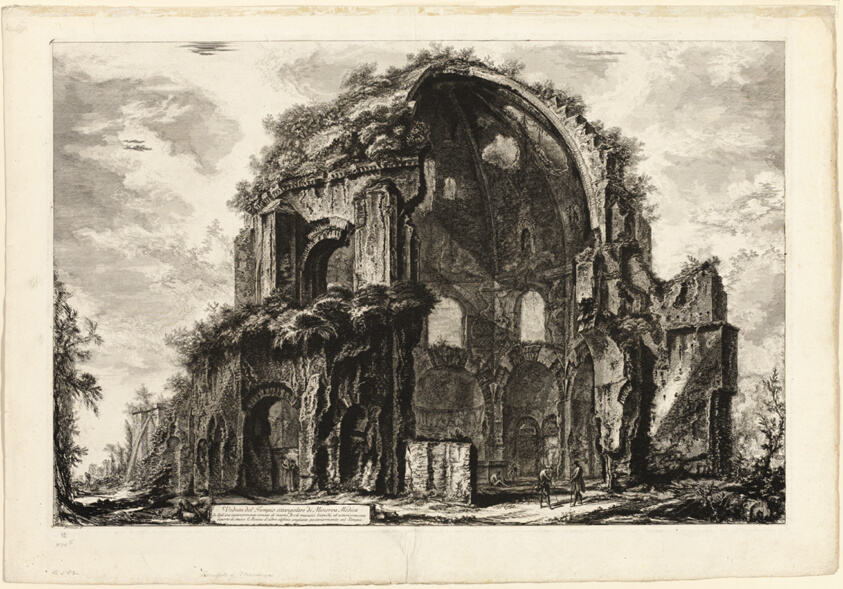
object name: Print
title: View of the Octagonal Temple of Minerva Medica, from Views of Rome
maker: Giovanni Battista Piranesi (Italian, 1720-1778); published by Francesco (Italian, 1758-1810) and Pietro Piranesi (Italian, born 1758/9)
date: 1764, published 1800–07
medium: Etching on heavy ivory laid paper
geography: Italy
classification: etching; print; prints and drawing